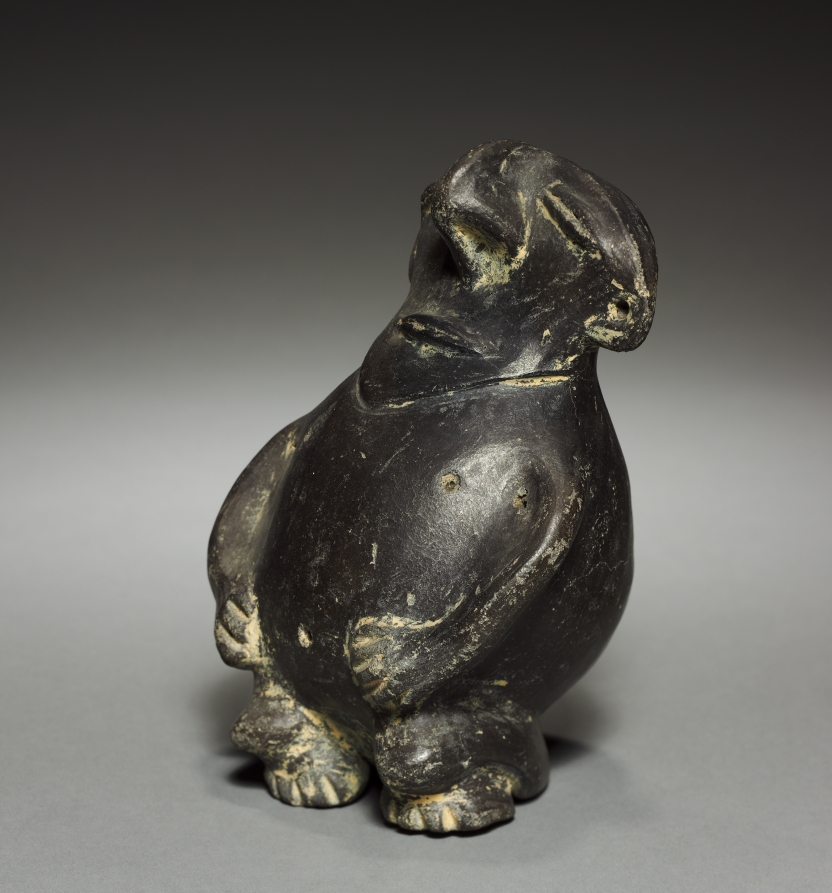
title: Figurine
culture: Colombia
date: before 1921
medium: pottery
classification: Ceramic